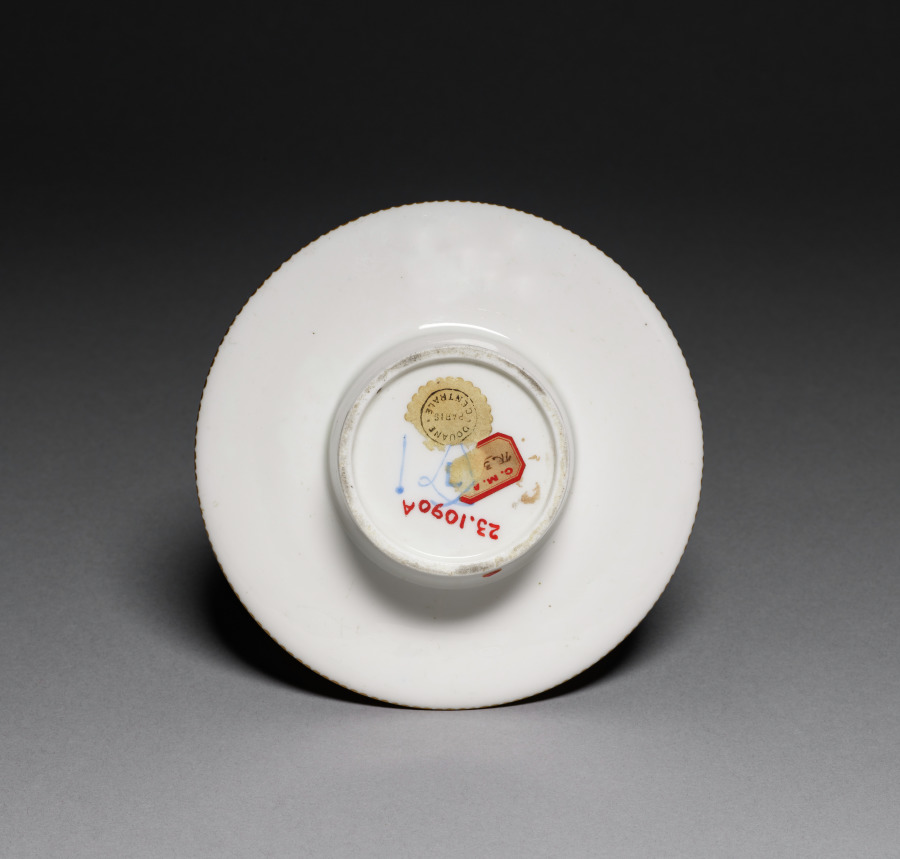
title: Saucer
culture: France, Sèvres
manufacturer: Sèvres Porcelain Factory (French, est. 1756)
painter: Louis-Jean Thévenet pere (French, 1708-)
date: 1764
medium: soft-paste porcelain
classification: Ceramic